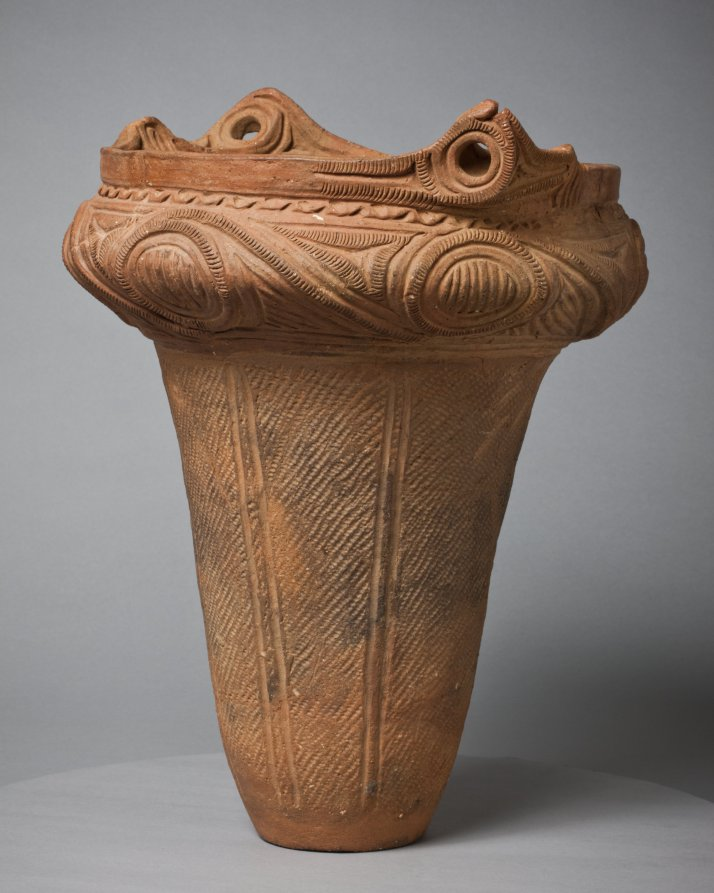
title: Urn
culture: Japan, Jōmon period (c. 10,500–300 BCE)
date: c. 2000 BCE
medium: earthenware, terracotta, impressed and incised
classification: Ceramic